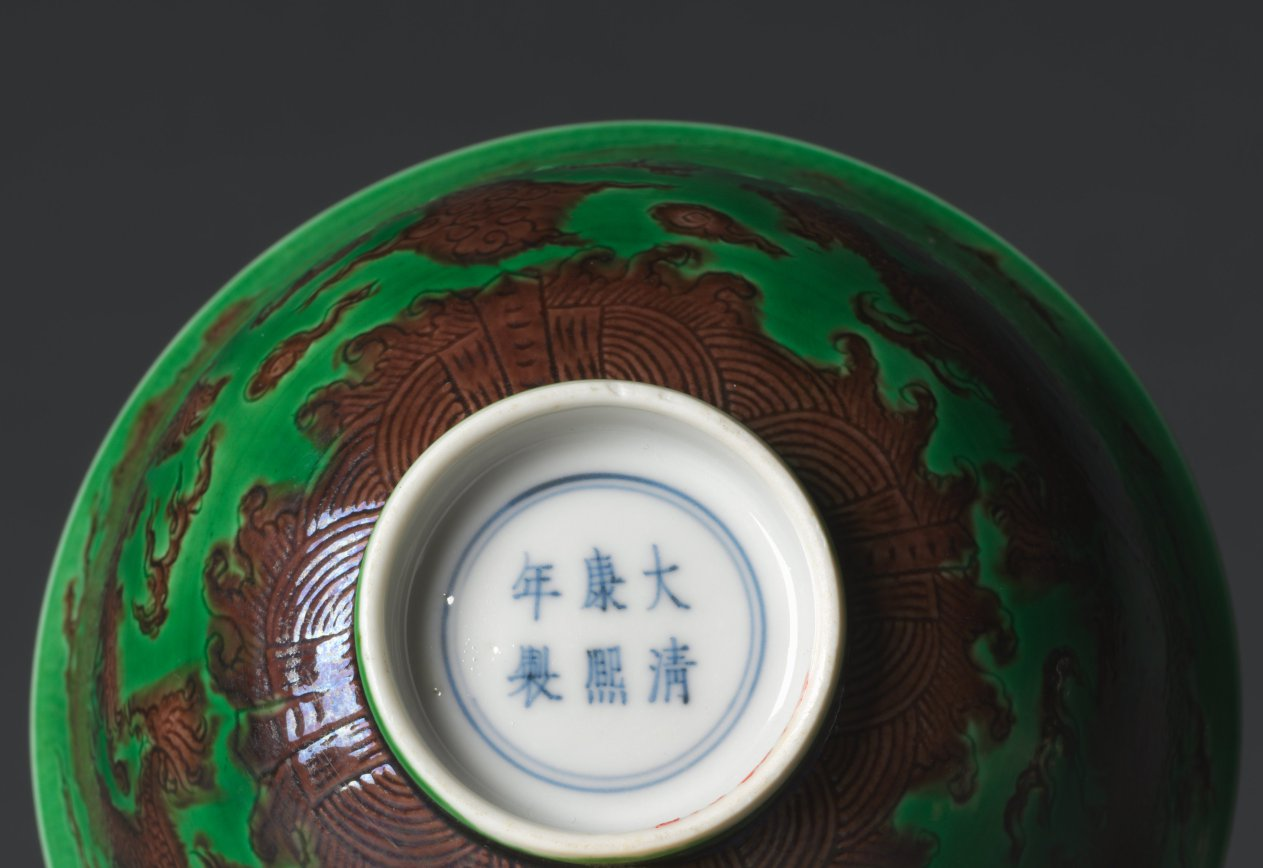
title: Bowl with Dragons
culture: China, Jiangxi province, Jingdezhen kilns, Qing dynasty (1644-1911), Kangxi mark and reign (1662-1722)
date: 1662–1722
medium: porcelain with incised and enamel decoration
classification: Ceramic